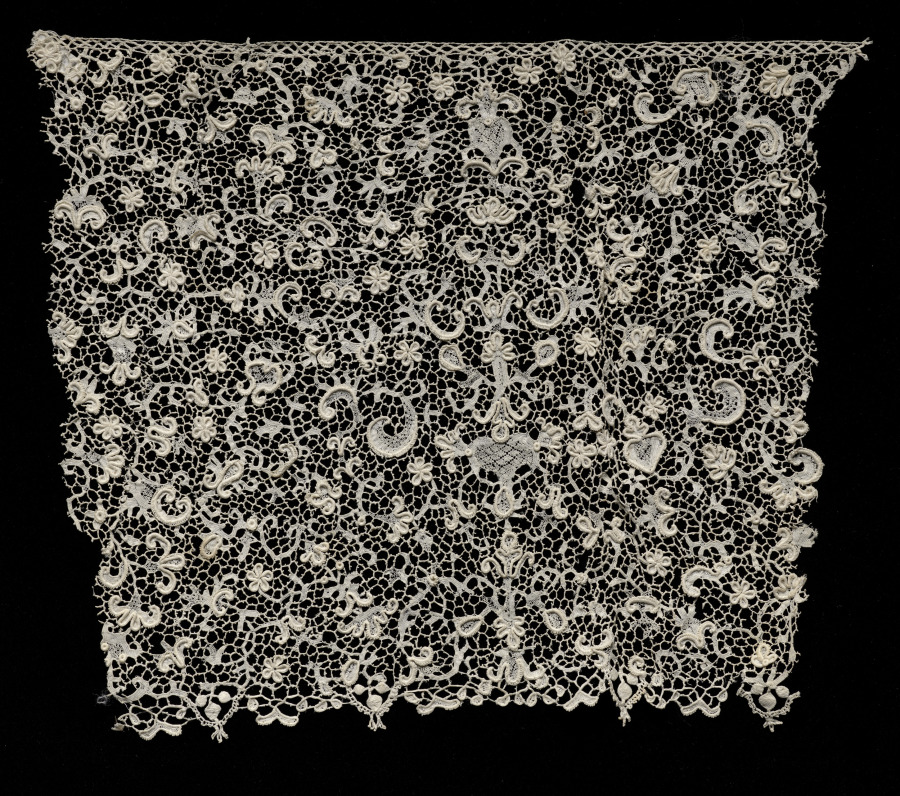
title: Needlepoint (Point de France) Lace Edging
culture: France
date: 1600s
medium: lace, needlepoint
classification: Lace